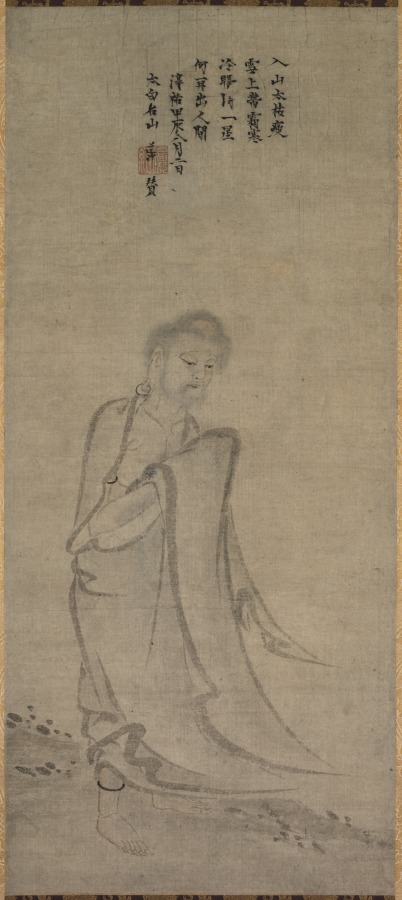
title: Shakyamuni Emerging from the Mountains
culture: China, Southern Song dynasty (1127-1279)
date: 1244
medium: hanging scroll; ink on paper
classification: Painting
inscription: 入山太枯瘦，雪上帶霜寒。 冷眼得一星，何再出人間。 淳祐甲辰八月二日 太白名山 道冲 贊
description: Shakyamuni emerged from the mountains after years of ascetic practices, which anticipated his sermon in Deer Park and attainment of enlightenment under the bodhi tree. However, this figure of Shakyamuni can be interpreted as having already achieved enlightenment and reentered the earthly world to spread the dharma (Buddhist law). Chijue Daoching’s inscription mentions his indifferent glance at the morning star, suggesting nonattachment: Entering the mountains he was much too thin and withered. The snow is overlaid with frost—it is cold. Casting an indifferent glance, he saw a [morning] star. Why should he once again emerge among the world of men.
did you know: The painting was inscribed by the abbot of Jingde Temple 景德寺 of Mount Tiantong 天童山 near Ningbo 寧波.